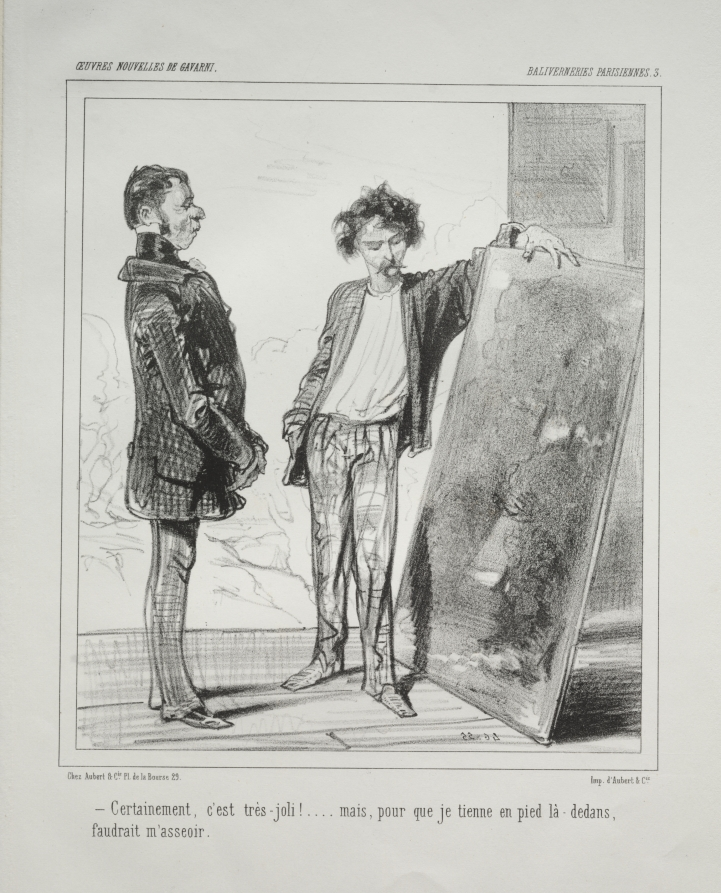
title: Baliverneries Parisiennes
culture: France, 19th century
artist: Paul Gavarni (French, 1804–1866)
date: c. 1847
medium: lithograph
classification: Print